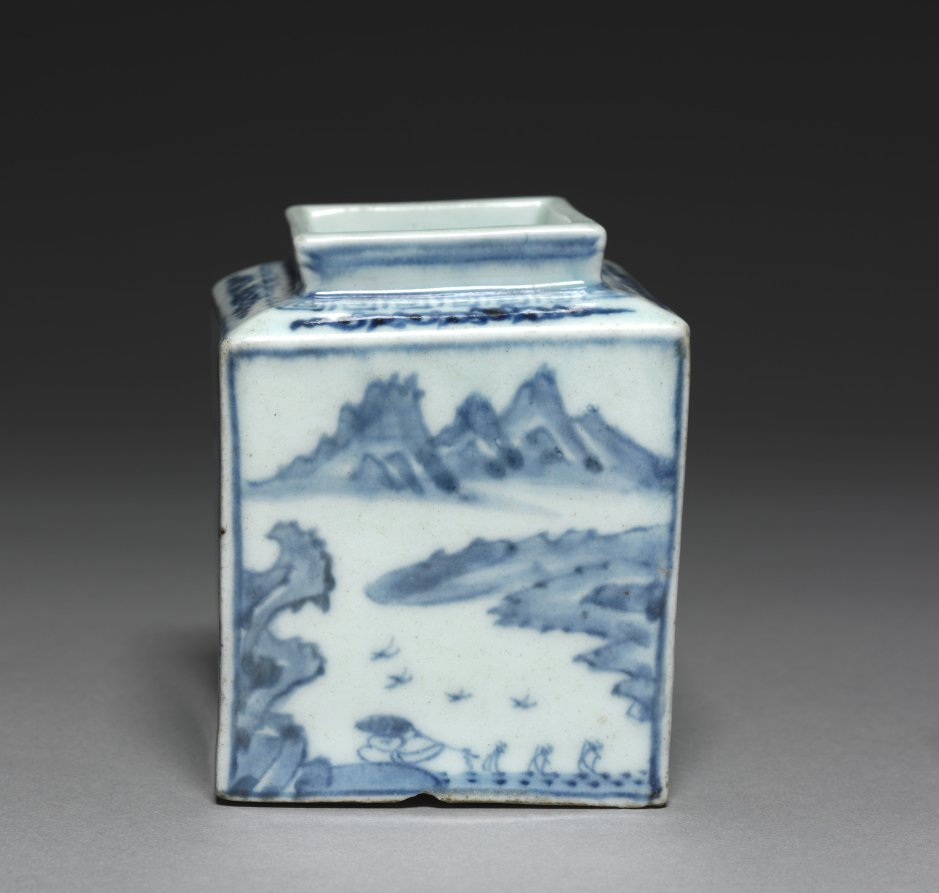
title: Square-shaped Bottle with the Scenery of the Han River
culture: Korea, Joseon dynasty (1392–1910)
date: 1800s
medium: porcelain with underglaze cobalt blue decoration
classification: Ceramic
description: The depicted scenery of this bottle is the Han River, the principal river crossing the center of Seoul. Since the 1700s, Korean artists began to paint the real landscape of Korea instead of imaginary ones of the Chinese tradition. This blue-and-white porcelain bottle is presumably a water dropper for ink. Each facet was separately made and put together before firing in a kiln. Both the landscape motif and faceted bottle were in vogue in the late 19th century, largely produced to meet the growing demand from the elite class.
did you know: The Han River is the principal river crossing the center of Seoul.